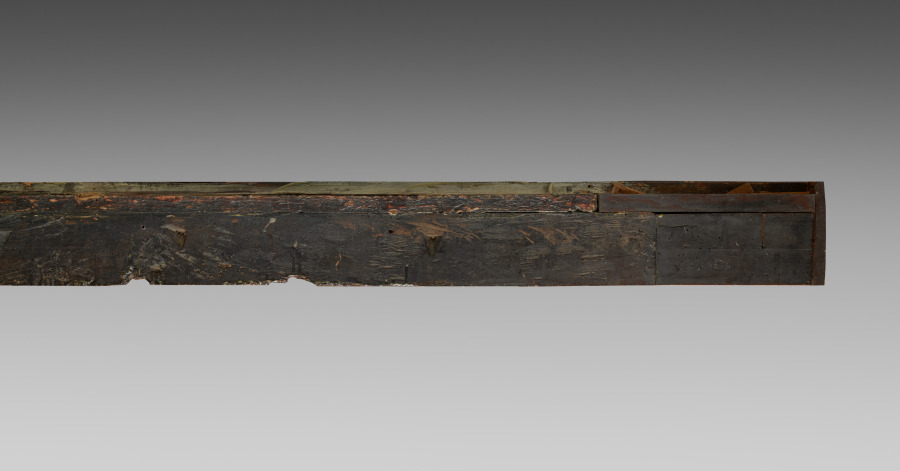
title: Upper Paneling from a Sacristy Armoire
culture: Italy, Florence, late 15th century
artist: attributed to Giuliano da Maiano (Italian, 1432–1490)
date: c. 1460–1475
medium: walnut, inlaid with holly and ebony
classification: Furniture and woodwork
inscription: in four of the five panels is the Medici badge of a jeweled ring wound with a ribbon or bannerole, on which is inscribed the motto "Semper." The frieze in the cornice contains part of a quotation from the Vulgate, Paul's epistle to the Romans, Chapter XI.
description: The imagery on the inset panels is the result of a technique known as intarsia, the skilled inlaying of woods of different colors to create a type of mosaic, popular during the 15th and 16th centuries in Italy for the decoration of paneling and furniture for studies, small rooms, and church sacristies. This large set of five intarsia panels comes from an unknown Florentine church. In its original setting the panels rested upon a row of similarly decorated cupboards (a sacristy armoire) which were used for the storage of liturgical vestments and books. This panel would have therefore been seen at eye level. The central panel depicts the Resurrection of Christ. The two outside panels depict the emblem of Lorenzo de Medici-three plumes encircled by a jeweled ring above a scrolling ribbon containing the Latin word SEMPER (Always). Lorenzo de Medici (1449-92) was the ruler of Florence when this sacristy armoire was constructed and was the likely patron. It seems to be the work of Giuliano da Maiano, an architect and intarsia-maker also responsible for the intarsia in the sacristy of Florence Cathedral.